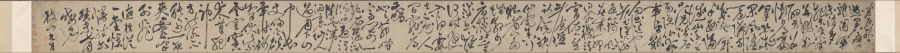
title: Retreat on an Autumn Day, in Cursive Script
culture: China, Ming dynasty (1368–1644)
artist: Zhu Yunming (Chinese, 1460–1527)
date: dated 1523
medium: Handscroll; ink on paper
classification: Calligraphy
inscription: 款識：讌於從一堂，爛漫醉書。癸未（1523）七月晦日也。枝山允明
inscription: 《閒居秋日》逃暑應能蹔閉關，未消多把古賢攀。並拋杯酌方為懶，少事篇章恐礙閑。風墮一庭鄰寺葉，雲開半面隔城山。浮生只說潛居易，隱比求（脫「名」）事更艱。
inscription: 《句曲道中》老至誰憐晝錦明，春來聊得客襟清。宵依星斗宮壇臥，曉（脫「入」）神仙宅舍行。眼看山多城郭少，肩挑詩重簿書輕。何時總入煙霞去。不見人間寵辱驚。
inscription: 《登茆峰》下馬門前一振衣，翠微高迥逼清微。雲端洞裡仙人過，月下山中長史歸。金焰暈牀砂氣伏，紫雲穿竇朮芽肥。神方能詠不能遇，一夜爽靈峰外飛。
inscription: 鈐印：「晞哲」、「允明」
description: This masterwork of calligraphy by Zhu Yunming from Suzhou combines two poems by the artist in cursive script style, characterized by its uninhibited, swift, and intuitive brushwork, so powerful that it here dissolved characters into dots or lines. Written from right to left and top to bottom and alternating in light dry to deep saturated ink, single characters may take a whole column or extend into the next one. Following the movement of the brush, they seem to dance over the paper.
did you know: Zhu Yunming stated that he was in an inebriated state when he created this work.